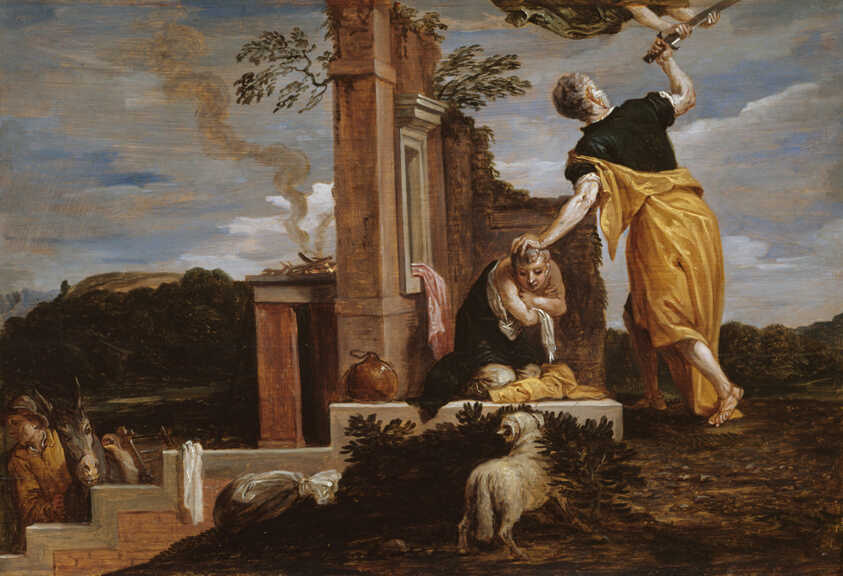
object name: Painting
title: Abraham's Sacrifice of Isaac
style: 17th Century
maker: David Teniers the Younger (Flemish, 1610–1690); After Paolo Veronese (Italian, 1528–1588)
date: 1654/56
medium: Oil on panel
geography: Italy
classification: oil on panel; paint; painting; european painting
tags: biblical, angels, swords, foliage, clouds, ruins, landscape architecture, landscape, donkeys, ram, children, man, sacrifice